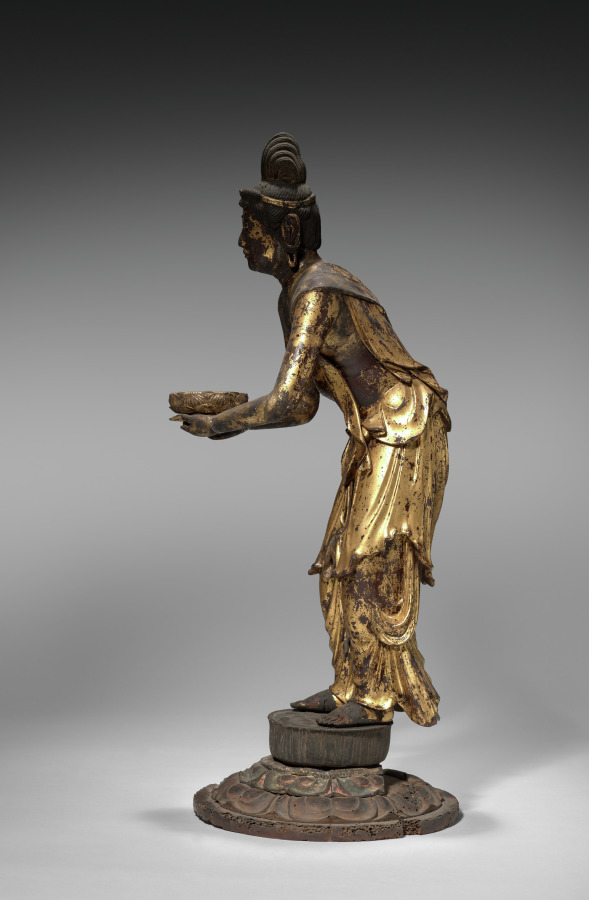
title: Kannon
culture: Japan, Kamakura period (1185–1333)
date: early 1200s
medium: wood with lacquer and gold leaf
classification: Sculpture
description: Kannon, the bodhisattva of compassion, is one of the two bodhisattvas attending Amida, the Buddha of the Western Paradise. The sculpture stands on a lotus pedestal, holding a lotus dais on which the soul of the faithful is received into paradise. The use of gold was prevalent in Buddhist art during this time—it was believed that the yellow light permeated the regions of the Amida—and Amida worship prevailed throughout Japan.